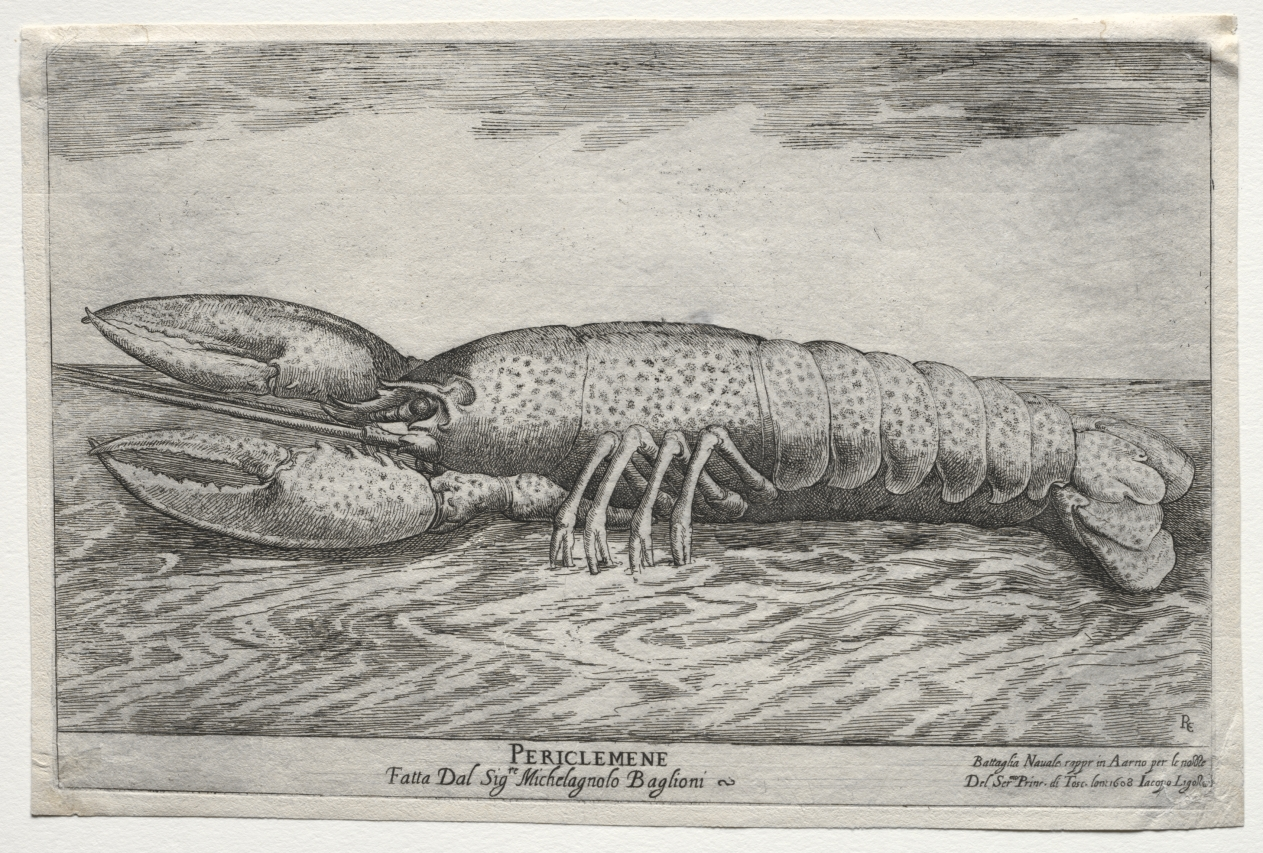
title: Naval Combat Represented on the Arno River in Florence, for the Marriage of Cosimo di Medici Prince of Tuscany, and Maria Maddalena of Austria, in 1608: Periclemene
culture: Italy, 17th century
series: a set of 19 plates Bataglia Navale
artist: Remigio Cantagallina (Italian, 1582/3–1656)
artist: after Jacopo Ligozzi (Italian, 1547–1626)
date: 1608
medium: etching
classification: Print